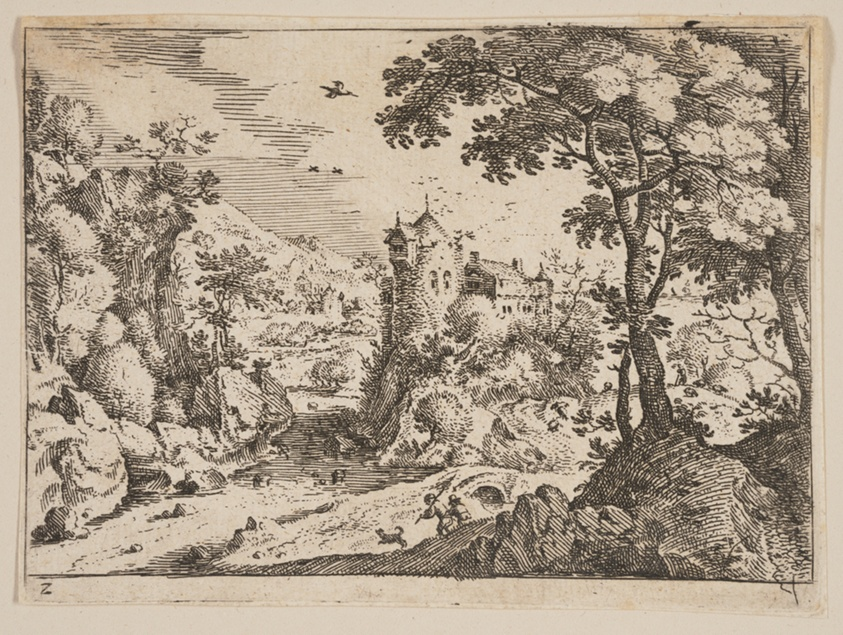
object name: Print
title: Stream between Rocky Hillside and Castle, from Landscapes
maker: Jacob Savery; Flemish, 1566–1603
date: c. 1595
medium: Etching on ivory laid paper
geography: Flanders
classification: etching; paper; print; prints and drawing